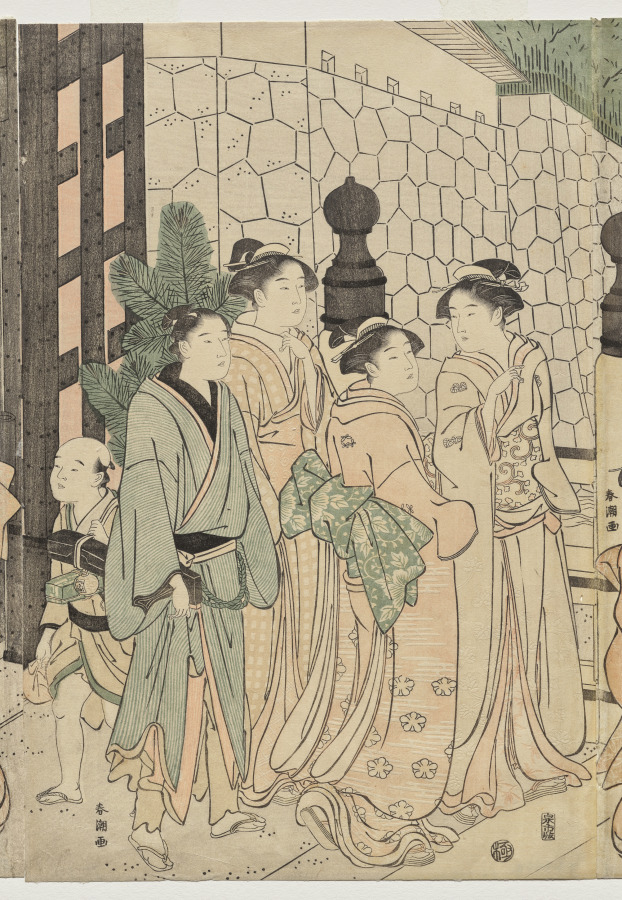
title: A Thousand Autumns, Ten Thousand Years on Tokiwa Bridge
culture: Japan, Edo period (1615–1868)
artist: Katsukawa Shunchō (Japanese)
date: early 1790s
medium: color woodblock print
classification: Print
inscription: Signature: Shuncho ga Publisher: Izumiya Ichibei (Senichi han) Censorship Seal: kiwame